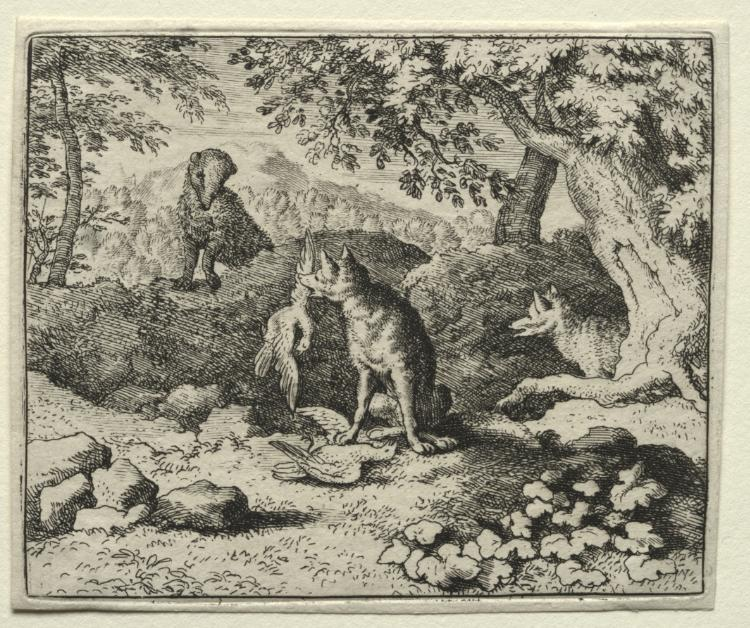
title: Reynard the Fox: Badger Comes to Warn Reynard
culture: Netherlands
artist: Allart van Everdingen (Dutch, 1621–1675)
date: 1650–75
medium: etching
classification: Print